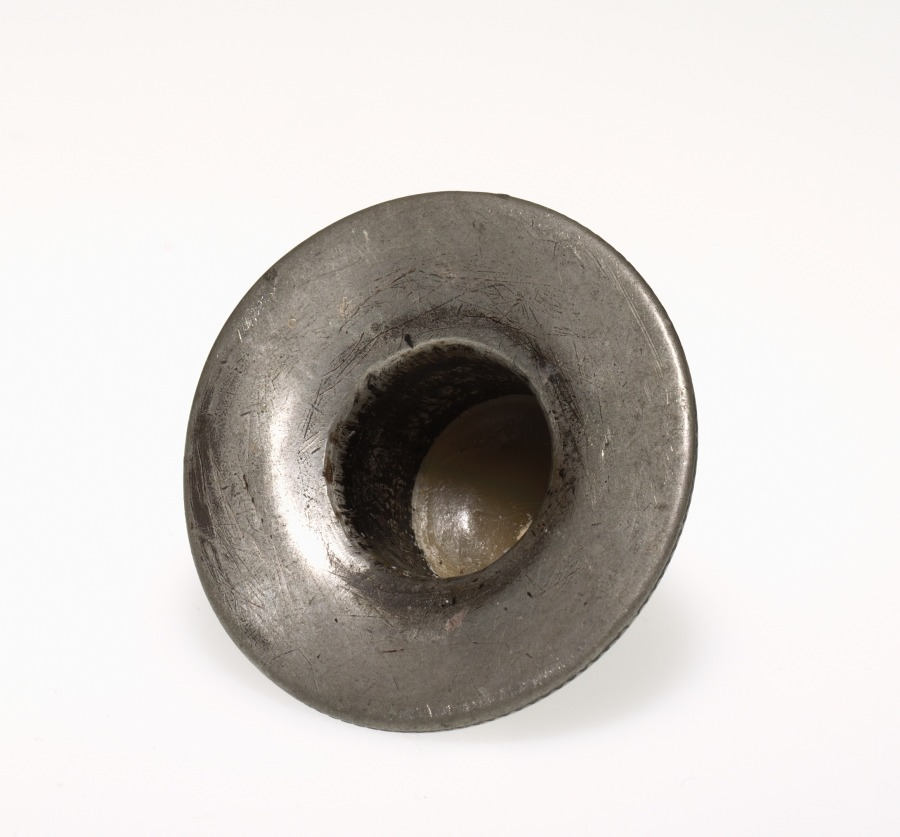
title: Pewter Bobeche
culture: America, Pennsylvania, Pittsburgh ?, mid 19th century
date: mid-1800s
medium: glass and detachable pewter bobeche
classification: Metalwork